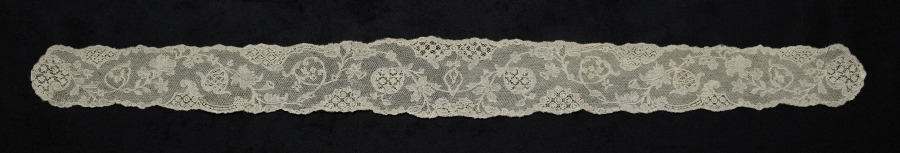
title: Lace Lappet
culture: Belgium, Mechelen(?)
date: 1740–60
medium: Linen: bobbin lace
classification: Lace